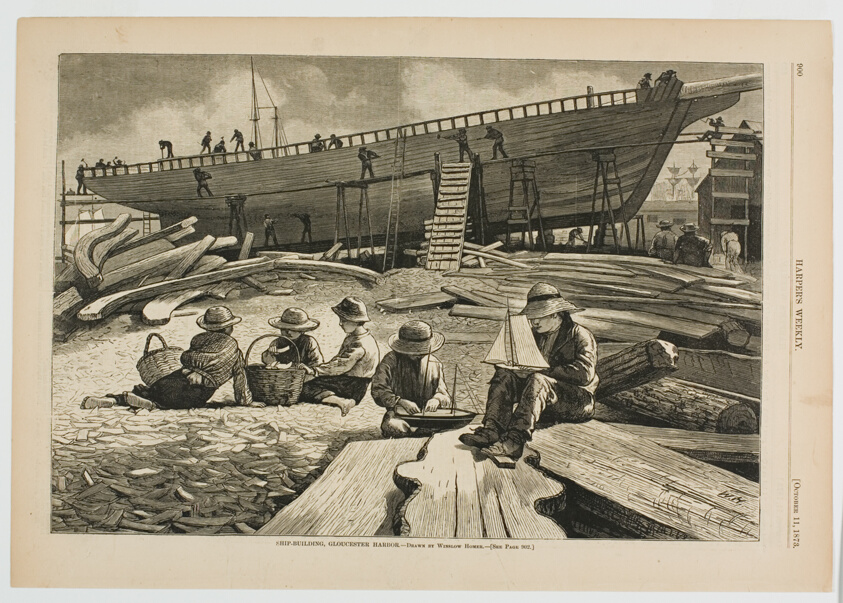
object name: Print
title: Ship Building, Gloucester Harbor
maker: Winslow Homer (American, 1836-1910); published by Harper's Weekly (American, 1857-1916)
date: published October 11, 1873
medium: Wood engraving on paper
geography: United States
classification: wood engraving; print; prints and drawing